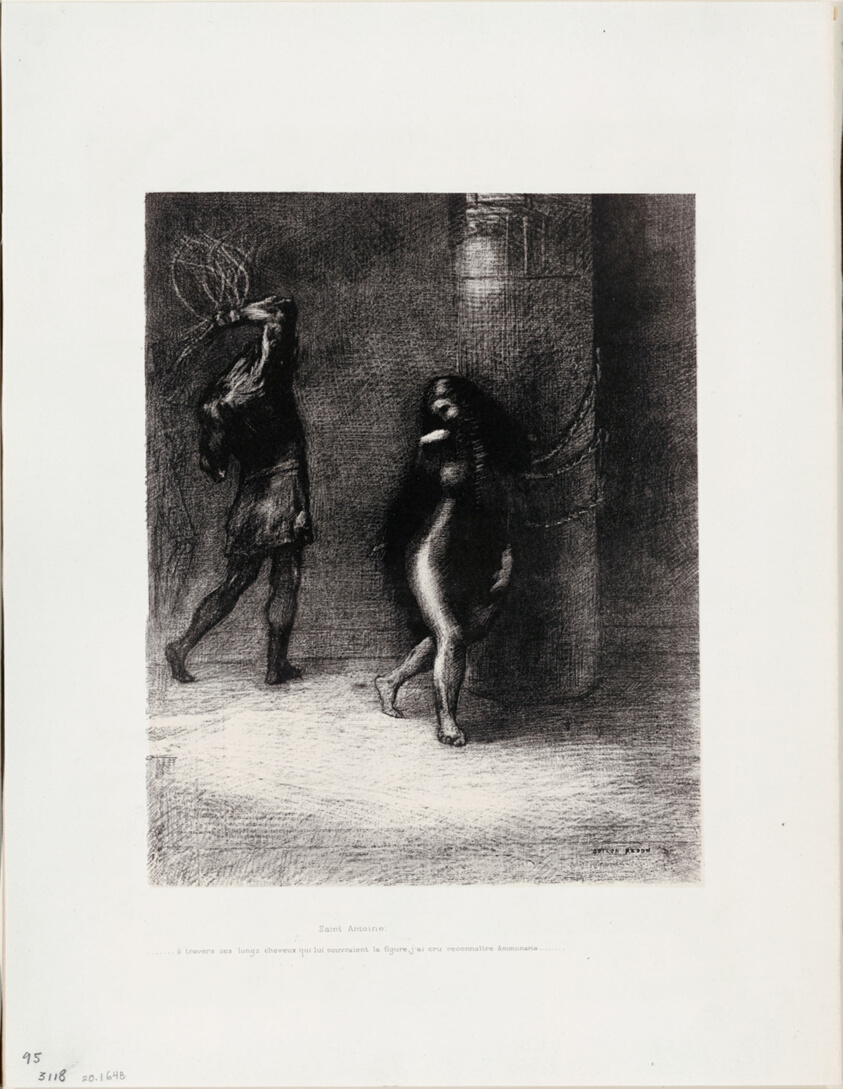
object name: Print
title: Saint Anthony: "Beneath her long hair, which covered her face, I thought I recognized Ammonaria", plate 1 of 6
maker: Odilon Redon (French, 1840-1916)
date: 1889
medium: Lithograph in black on ivory China paper laid down on ivory wove paper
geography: France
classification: lithograph; print; prints and drawing; paper